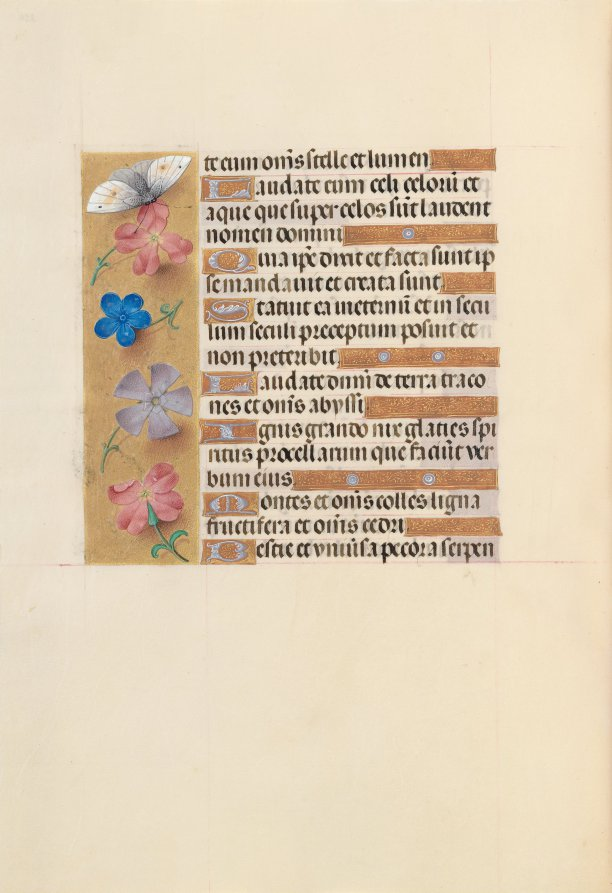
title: Hours of Queen Isabella the Catholic, Queen of Spain: Fol. 252v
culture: Flanders, Ghent and Bruges, late 15th century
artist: Master of the First Prayerbook of Maximillian (Flemish, c. 1444–1519)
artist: and Associates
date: c. 1500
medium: ink, tempera, and gold on vellum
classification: Bound Volume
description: This manuscript was illuminated by a circle of at least five highly organized manuscript painters active in the Flemish cities of Ghent and Bruges. The principal illuminator was Alexander Bening, who painted the majority of the book's miniatures. Manuscripts produced by this circle of artists are renowned for the decoration of their borders, which typically feature a rich variety of realistically-painted flowers, birds, and butterflies. This prayer book, called a book of hours, was intended not for a cleric, but for the private devotions of a lay person-in this case, Isabella the Catholic, Queen of Spain (1451-1504). Isabella's coat of arms embellishes the book's frontispiece. It is unlikely that the book was commissioned by the Queen herself; rather, she probably received it as a diplomatic gift from someone courting her patronage, perhaps Cardinal Francisco Jimenez de Cisneros. A Franciscan friar, Jimenez was dependent upon Isabella for his advancement, first to the post of Queen's confessor in 1492, and then to Archbishop of Toledo in 1495.